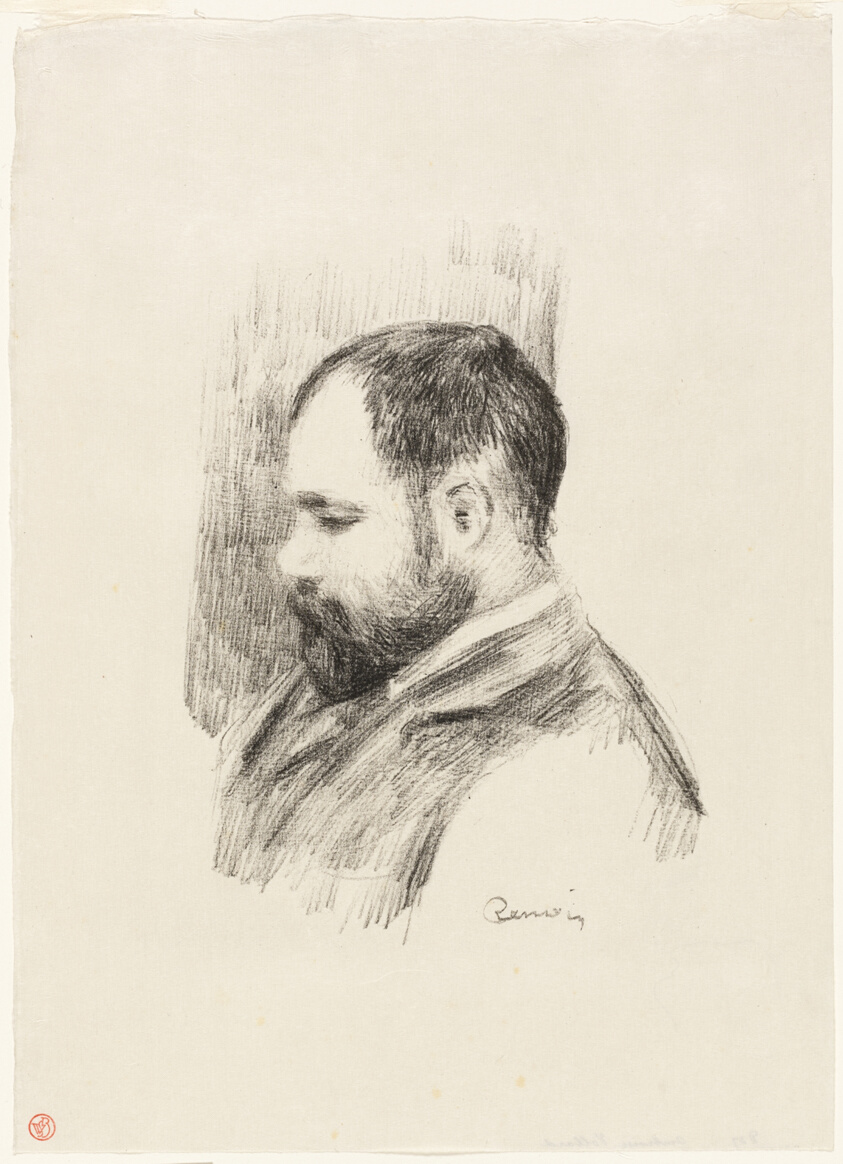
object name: Print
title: Portrait of Ambroise Vollard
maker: Pierre Auguste Renoir (French, 1841-1919); printed by Auguste Clot (French, 1858-1936); published by Ambroise Vollard (French, 1835-1939)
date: c. 1904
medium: Lithograph on ivory wove paper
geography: France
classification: lithograph; print; prints and drawing